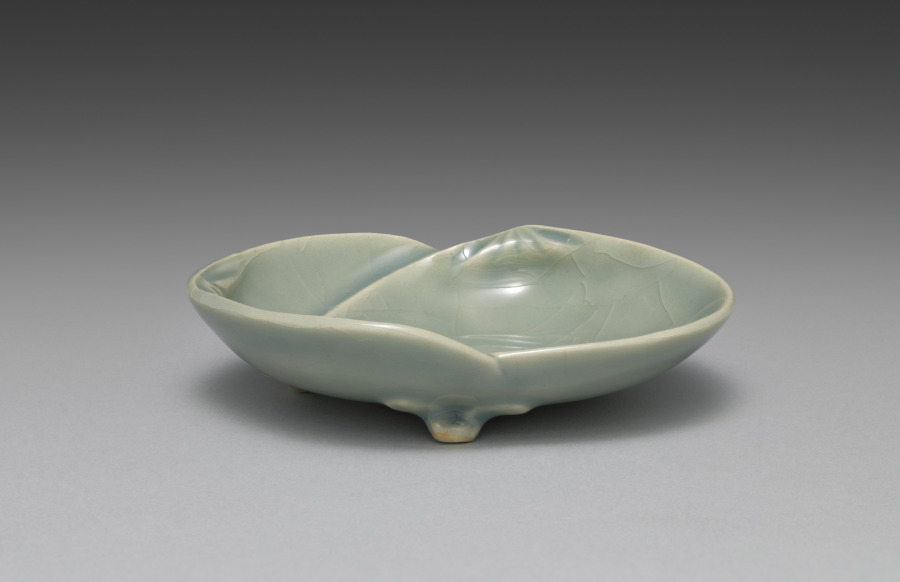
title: Dish from Saucers with Matching Shells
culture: Japan, Meiji period (1868–1912)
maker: Seifū Yohei III (Japanese, 1851–1914)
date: 1893–1914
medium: Porcelain with molded design and green crackled glaze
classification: Ceramic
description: Yohei III’s main output for his sophisticated clientele was in the form of tea sets and dining sets. He created a range of dishes in green glazes. He often produced in pairs, sets of five, or sets of ten. The set of five dishes with a more complex form is described as having a “water-colored glaze” (mizuiroyū). These are shaped like clam half shells, a reference to a game in which shell halves painted with narrative scenes or a variety of motifs must be matched back together by the players. The dishes have molded details to articulate the shell forms, and the crackling across each shell adds another dimension to the surface. Each dish is set on three small feet, formed by a pinched piece of clay and attached to an unglazed area on the underside of the dish. Curiously, while four of the dishes are stamped with the artist’s mark, one has instead a signature carved into the base.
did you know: Each of the paired-shell dishes has its own compartment in a long, flat box.